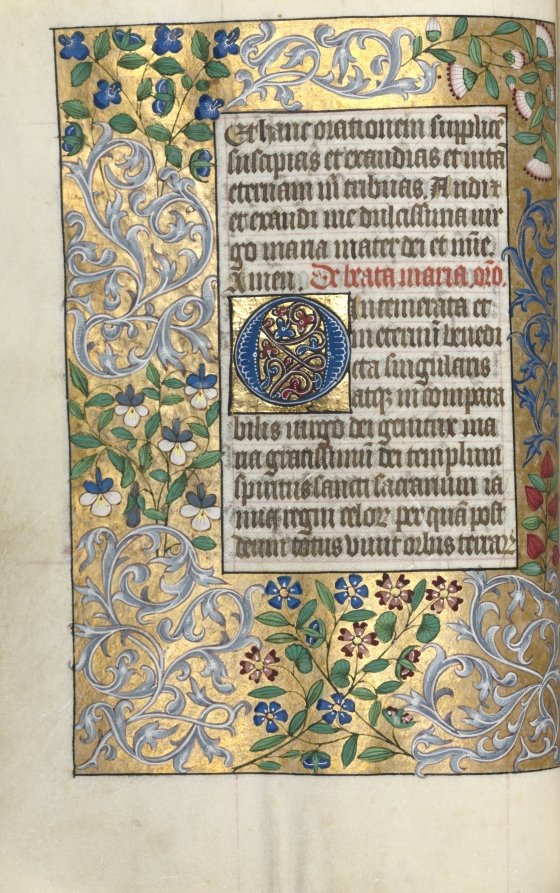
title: Book of Hours (Use of Rouen): fol. 22v, Prayer to the Virgin, Large Initial O with Elaborate Border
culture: France, Rouen, 15th century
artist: Master of the Geneva Latini (French, active Rouen, 1460–80)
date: c. 1470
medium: ink, tempera, and gold on vellum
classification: Bound Volume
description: In the late 1400s and early 1500s Rouen was an established and important center of book production. The city’s cathedral had a wealthy chapter that spent large sums of money to commission books and to maintain its extensive library. The stationers and booksellers would have likely been concentrated in or near the cathedral precinct. This artist, named after a manuscript now in Geneva, was Rouen’s principal illuminator during the second half of the 1400s.